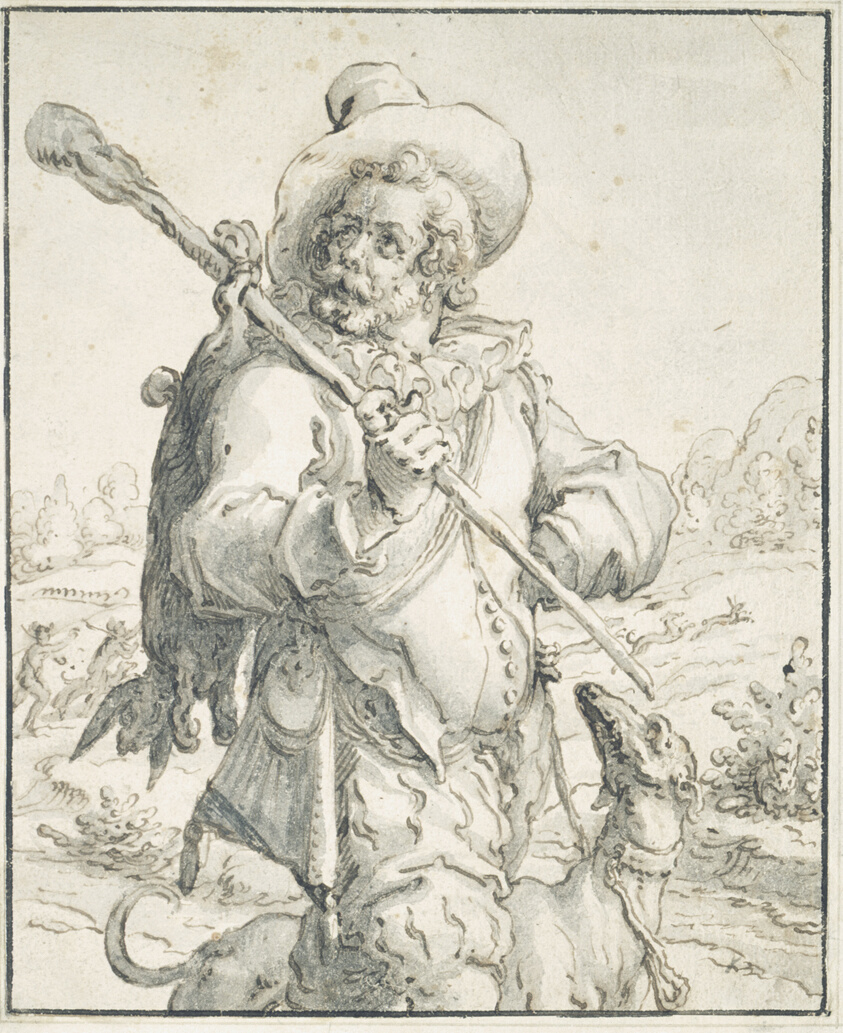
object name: Drawing and Watercolor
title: A Huntsman with a Dead Hare and a Dog (Study for "Terra")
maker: Jacques de Gheyn II; Dutch, 1565-1629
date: 1590/95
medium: Pen and brown ink and brush and gray wash, over touches of charcoal, ruled with pen and black ink, on ivory laid paper, incised with a stylus for transfer, laid down on cream laid paper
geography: Netherlands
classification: ink or chalk wash; drawings (visual works); prints and drawing